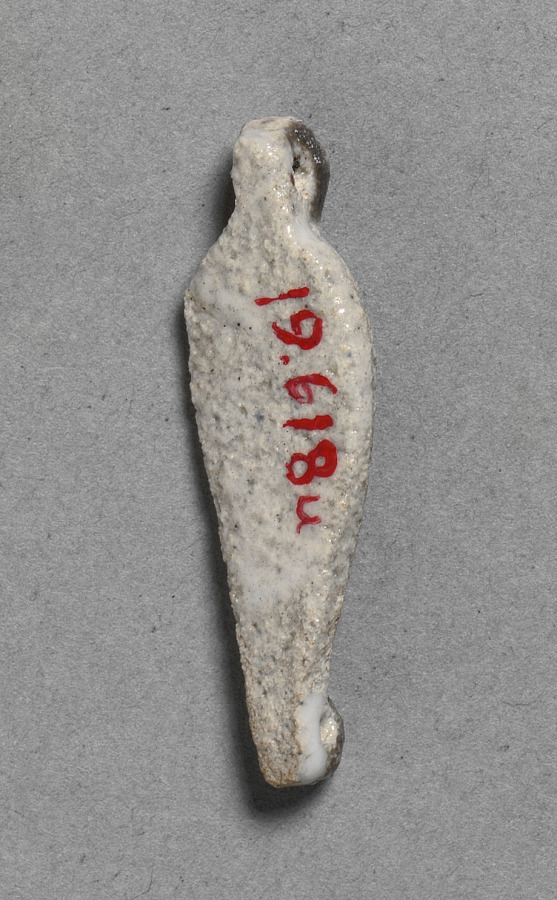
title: Petal-Shaped Bead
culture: Egypt, New Kingdom (1540–1069 BCE), Dynasty 18, reign of Amenhotep III (1390–1352 BCE)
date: c. 1391–1353 BCE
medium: faience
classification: Jewelry